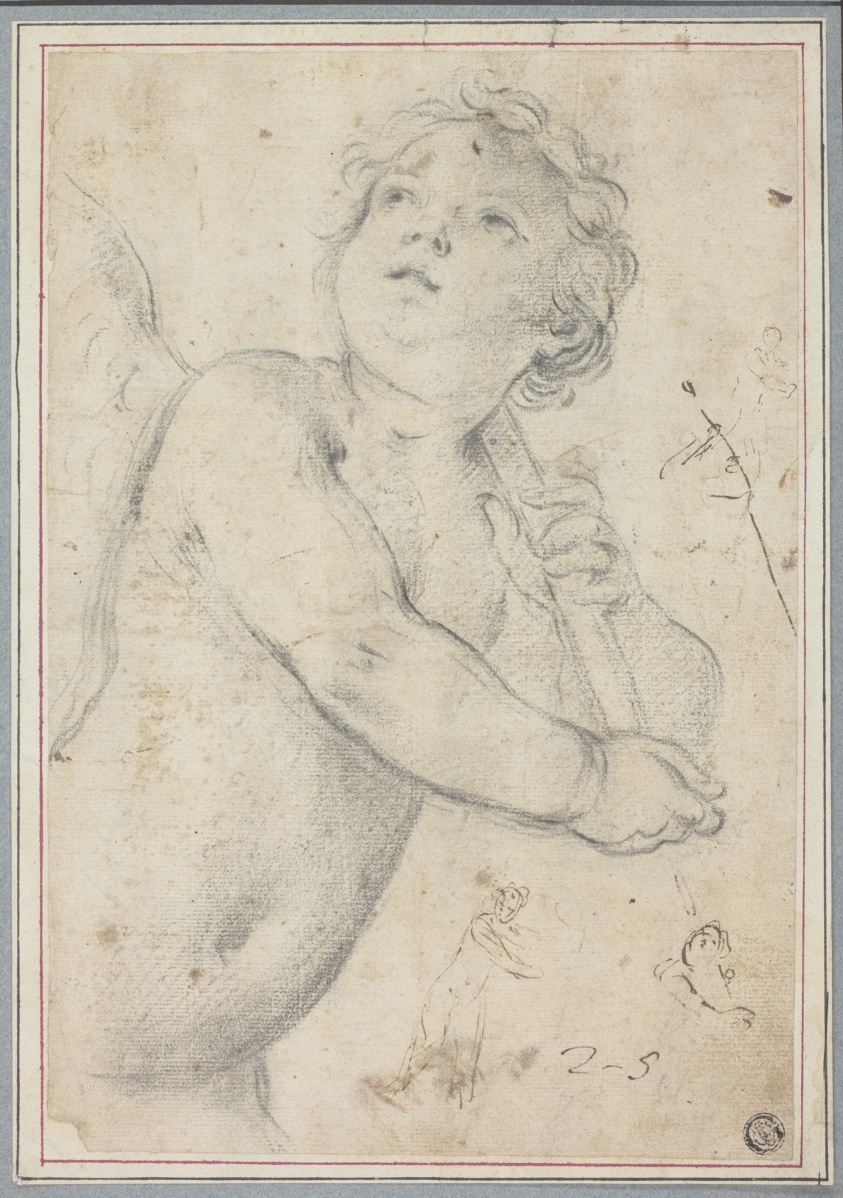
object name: Drawing and Watercolor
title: Putto Holding Staff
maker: After Guido Reni (Italian, 1575-1642); or possibly Marcantonio Franceschini (Italian, 1648-1729); or Carlo Cignani (Italian, 1628-1719)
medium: Black chalk with pen and brown ink on cream laid paper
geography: Italy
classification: graphite; drawings (visual works); prints and drawing